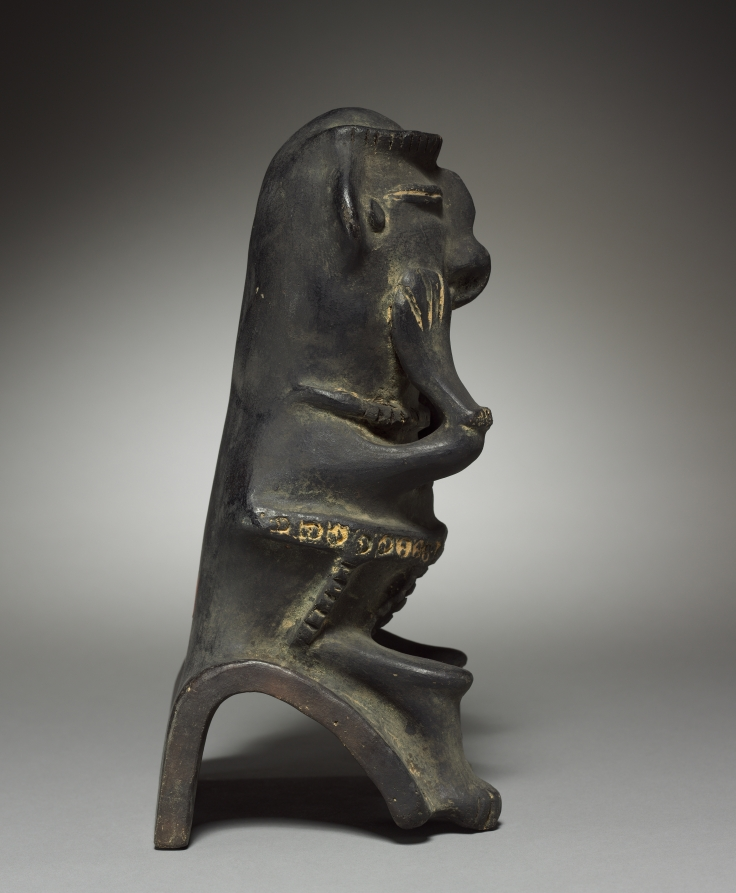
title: Seated Figure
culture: Colombia, Pre-Columbian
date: before 1921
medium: earthenware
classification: Ceramic